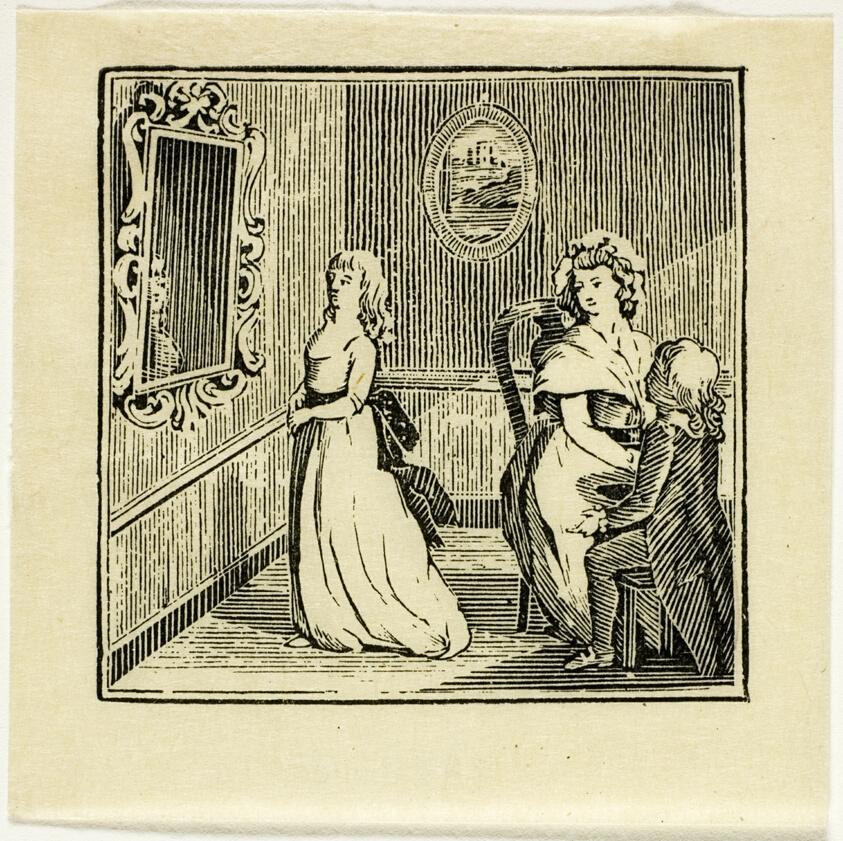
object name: Print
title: Book Illustration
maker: Thomas Bewick (English, 1753-1828)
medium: Wood engraving on paper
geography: England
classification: wood engraving; print; prints and drawing